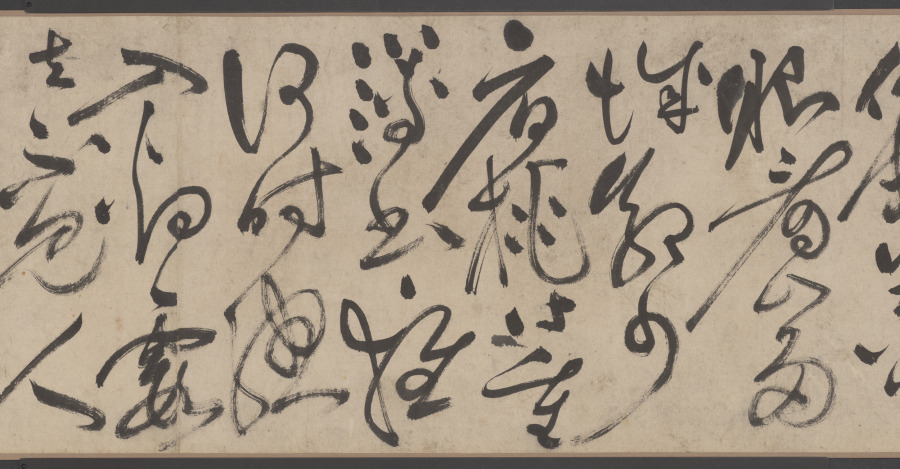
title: Retreat on an Autumn Day, in Cursive Script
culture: China, Ming dynasty (1368–1644)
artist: Zhu Yunming (Chinese, 1460–1527)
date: dated 1523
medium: Handscroll; ink on paper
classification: Calligraphy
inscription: 款識：讌於從一堂，爛漫醉書。癸未（1523）七月晦日也。枝山允明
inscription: 《閒居秋日》逃暑應能蹔閉關，未消多把古賢攀。並拋杯酌方為懶，少事篇章恐礙閑。風墮一庭鄰寺葉，雲開半面隔城山。浮生只說潛居易，隱比求（脫「名」）事更艱。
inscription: 《句曲道中》老至誰憐晝錦明，春來聊得客襟清。宵依星斗宮壇臥，曉（脫「入」）神仙宅舍行。眼看山多城郭少，肩挑詩重簿書輕。何時總入煙霞去。不見人間寵辱驚。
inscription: 《登茆峰》下馬門前一振衣，翠微高迥逼清微。雲端洞裡仙人過，月下山中長史歸。金焰暈牀砂氣伏，紫雲穿竇朮芽肥。神方能詠不能遇，一夜爽靈峰外飛。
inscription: 鈐印：「晞哲」、「允明」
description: This masterwork of calligraphy by Zhu Yunming from Suzhou combines two poems by the artist in cursive script style, characterized by its uninhibited, swift, and intuitive brushwork, so powerful that it here dissolved characters into dots or lines. Written from right to left and top to bottom and alternating in light dry to deep saturated ink, single characters may take a whole column or extend into the next one. Following the movement of the brush, they seem to dance over the paper.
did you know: Zhu Yunming stated that he was in an inebriated state when he created this work.